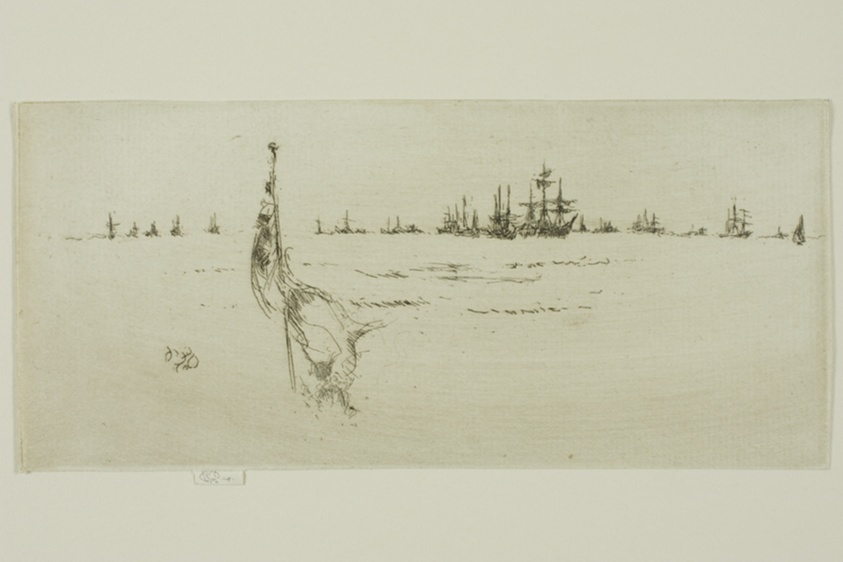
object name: Print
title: Dipping the Flag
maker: James McNeill Whistler (American, 1834-1903)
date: 1887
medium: Etching and drypoint in black ink on cream laid paper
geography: United States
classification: etching; print; prints and drawing; paper; drypoint